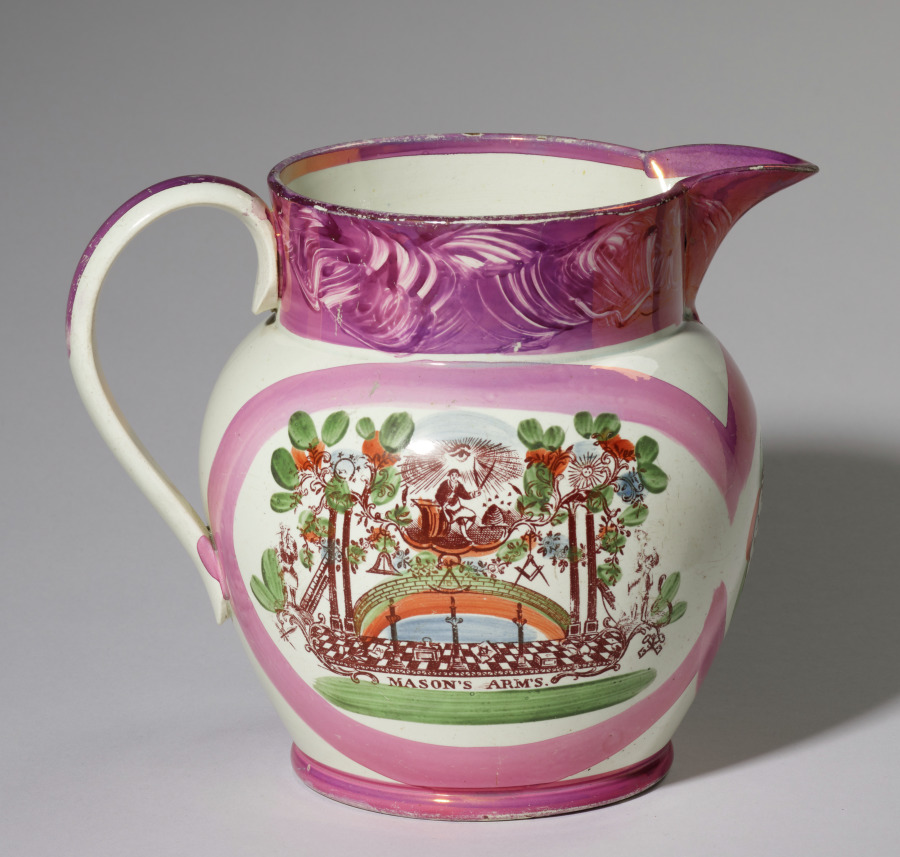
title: Masonic Pitcher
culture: England, Staffordshire, late 18th-early 19th Century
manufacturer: Staffordshire Factory (British)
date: c. 1800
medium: pottery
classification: Ceramic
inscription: on front: "MASON'S ARMS"; on one side: "A little health a little wealth, a little house with freedom, And at the end a little friend With little cause to need him"; on other side: "Here's to you My Jovial brother, When this is out We'll have another."